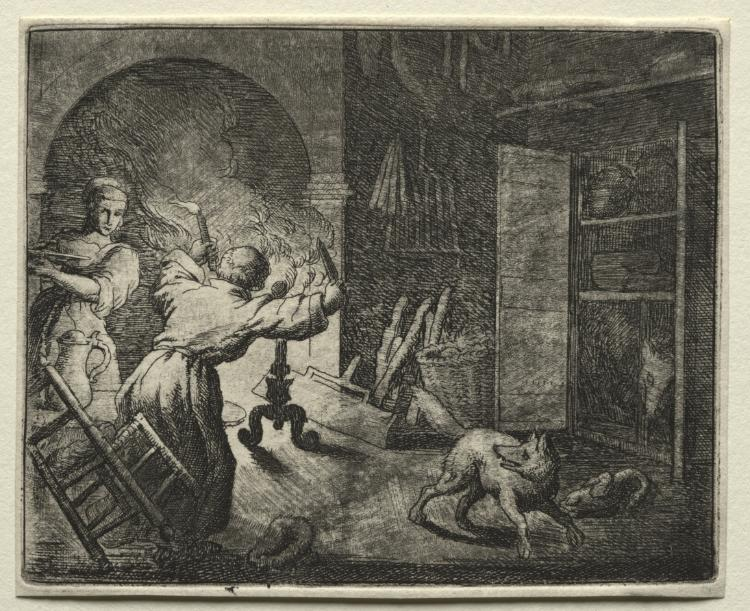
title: Reynard the Fox: Reynard Steals a Capon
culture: Netherlands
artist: Allart van Everdingen (Dutch, 1621–1675)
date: 1650–75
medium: etching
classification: Print